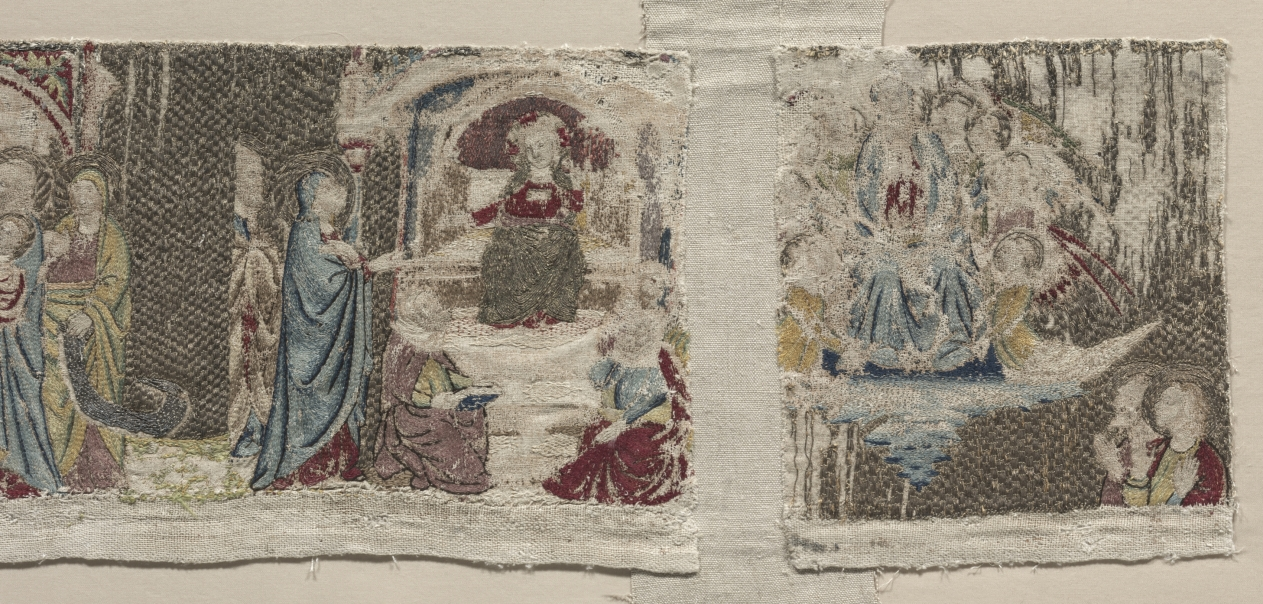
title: Scenes of the Life of the Virgin, from an Altar Frontal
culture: Italy, Florence, 14th century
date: 1330s or 1340s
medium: Silk, gold thread, linen; raised work, embroidery: split, stem, running, fishbone, and couching stitches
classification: Embroidery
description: This rare panel originally hung above a large embroidery that decorated the front of an altar in a church. The narrative begins with the Virgin’s parents and her early life; that panel is now in the Toledo Museum of Art. Cleveland’s portion continues the story with the Annunciation of the Virgin, Adoration of the Shepherds, Adoration of the Magi, Presentation of Christ, Christ among the Doctors, and the Assumption of the Virgin. The Death of the Virgin scene is likely missing. Painters usually sketched designs on stretched linen for embroiderers. Gold thread enriches the background and is secured in place with couching stitches in a small brick pattern.